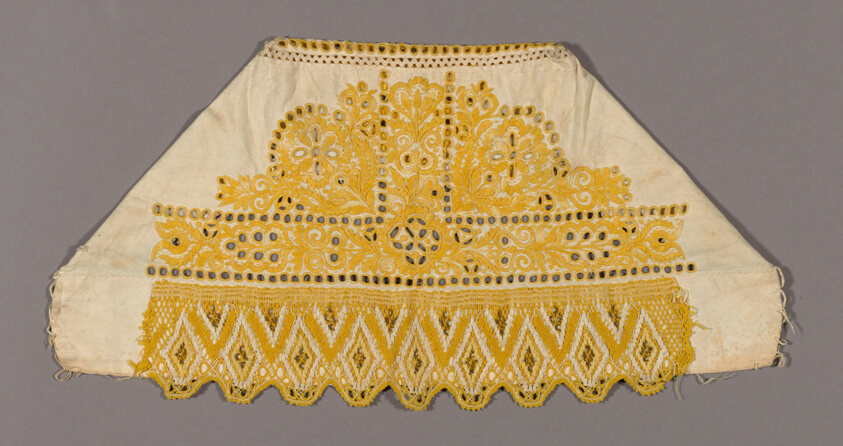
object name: Textile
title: Cap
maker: Czech Republic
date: 19th century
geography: Czech Republic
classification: textile; needlework (visual works); costume accessory; costume; dress (garment); clothing